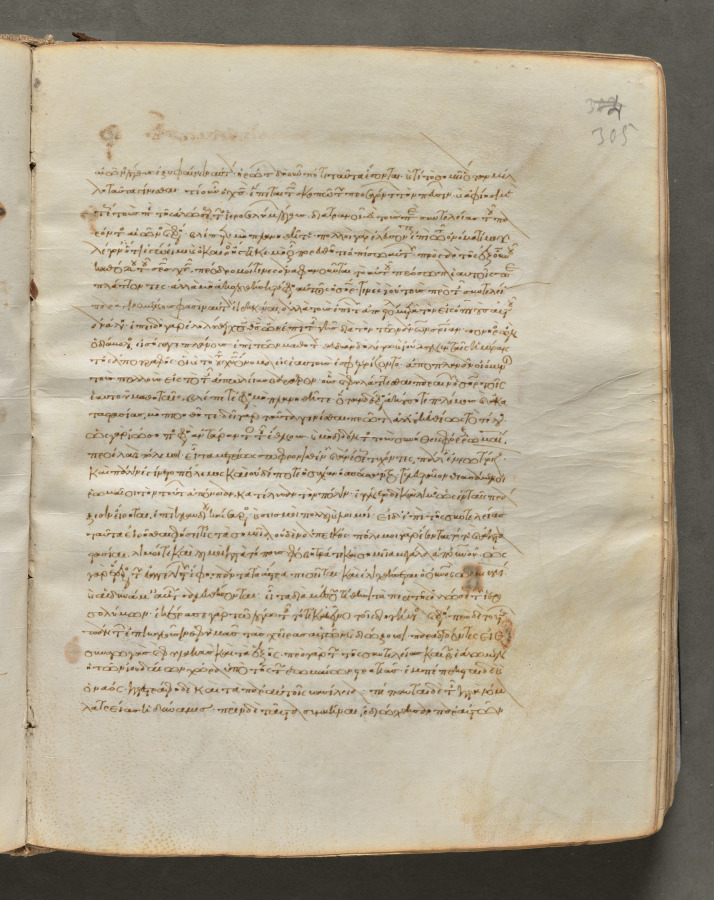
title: Text, folio 305 (recto), from a Gospel Book with Commentaries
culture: Byzantium, Constantinople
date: c. 1000–1100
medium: ink, tempera, and gold on vellum; leather binding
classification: Bound Volume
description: Each of the four gospels in this book opens on a page with brilliantly illuminated borders depicting the author of the text as well as birds—principally peacocks, symbols of the immortality of the soul—and fountains, representing the fountain of life and the salvation of the soul. This volume consists of 428 leaves with texts in Greek. Its level of sophistication suggests that it was probably written and decorated in a monastery in Constantinople.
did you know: Gospel books were carried in procession through Byzantine churches.